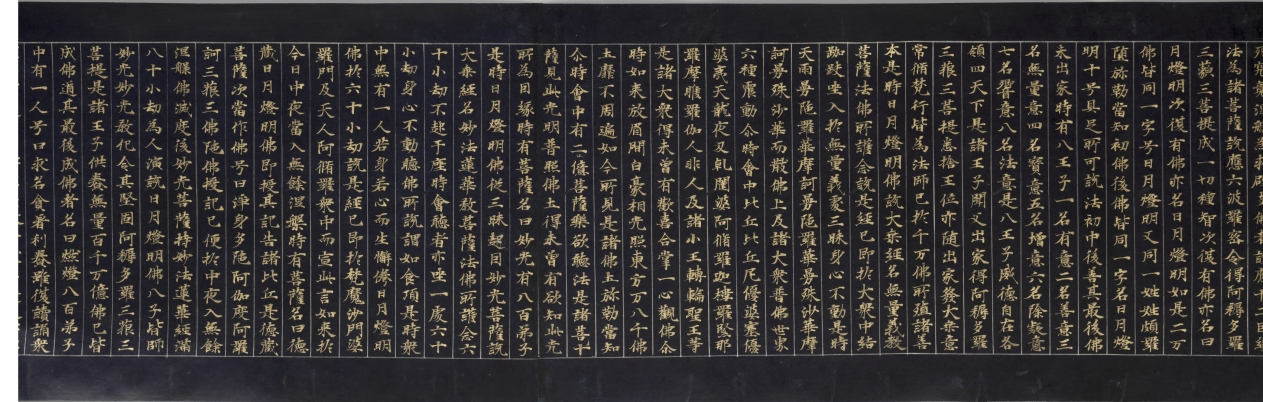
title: Lotus Sutra with a Frontispiece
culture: China, Song dynasty (960–1279)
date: late 1100s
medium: handscroll; gold ink on indigo sutra paper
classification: Painting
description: The frontispiece of this sutra, a sacred Buddhist scripture, illustrates episodes mentioned in the Buddha’s teaching. The sutra begins with a description of the historic Buddha Shakyamuni’s assembly on Vulture Peak. On the right, the Buddha sits amid members of his congregation: lohans (or arhats), bodhisattvas, gods, and other beings. The narrative proceeds from right to left. Heavenly light emanates from Shakyamuni’s brow to “illuminate the eighteen thousand worlds to the east.” Illustrated immediately below the ray is the sutra’s promise that if anyone carves or paints images of the Buddha “they will achieve the Buddha path.” The female figures in the frontispiece point to another promise made in this popular Mahayana school sutra, namely that female devotees and nuns who read the sutra are promised Buddhahood and salvation.